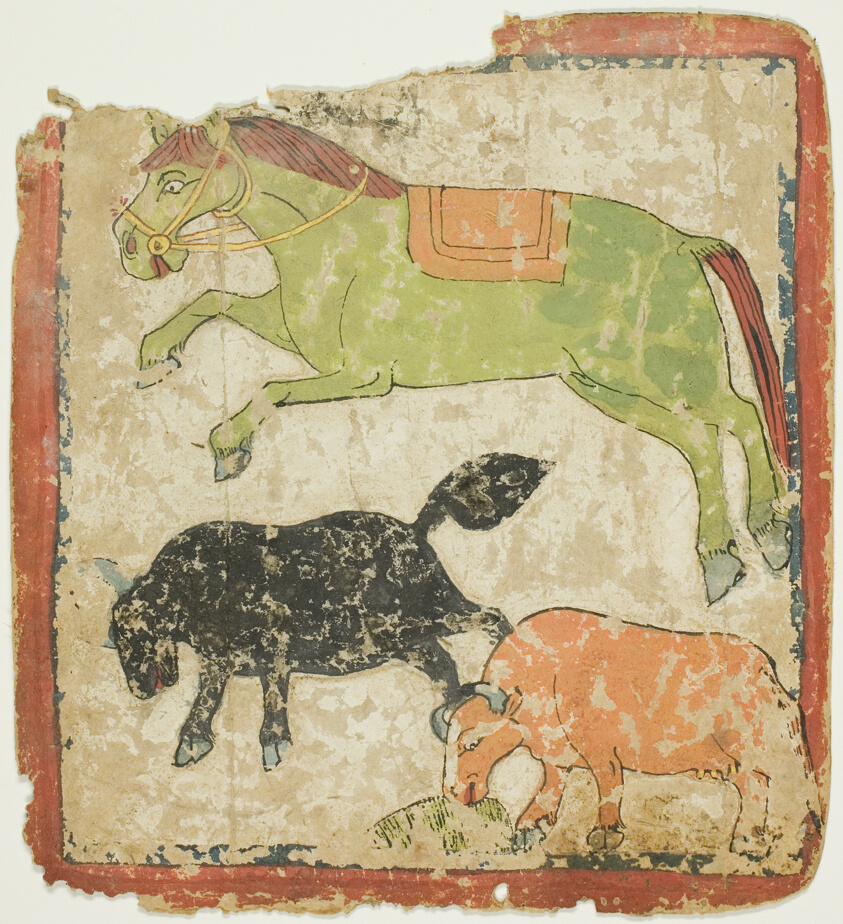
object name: Religious/Ritual Object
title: Image from a Set of Initiation Cards (Tsakali)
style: Himalayan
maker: Southern Tibet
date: 14th/15th century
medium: Ink and watercolor on paper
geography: Tibet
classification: ink; ritual objects